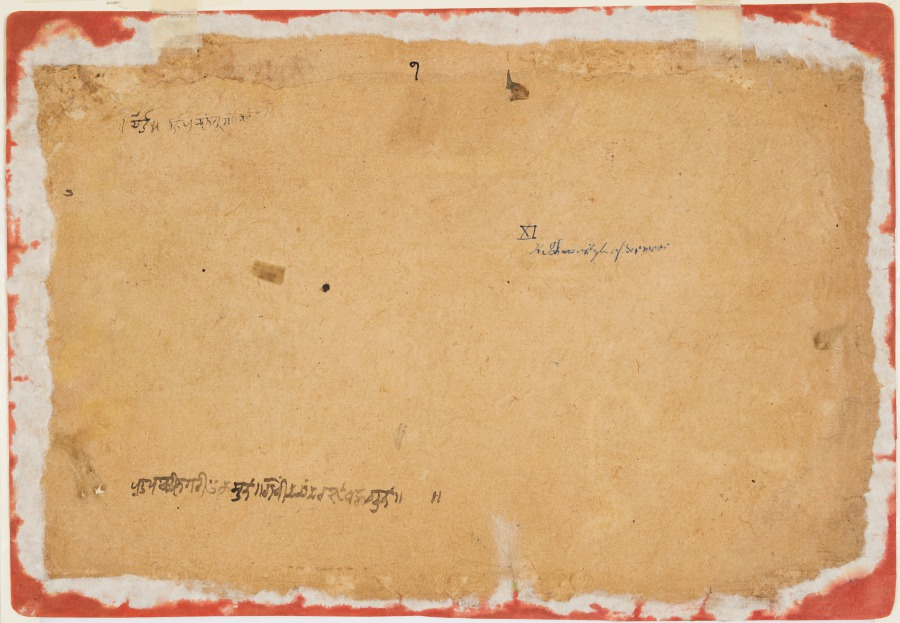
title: Madhava faces a man holding a scale, folio 1 from a Madhavanala-Kamakandala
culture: Northern India, Pahari kingdoms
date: c. 1720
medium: gum tempera, ink, and gold on paper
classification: Painting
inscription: Takri number ‘1’ on verso; one line of Takri script; (in English) Roman numeral: XI; K. Iswari Singh of Sirmur; puhpāvatī nagarī īka sunā. gobiṃdachaṃda rajā bahugunā.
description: In the opening page of the series, the artist sets the scene in the city of Pushpavati. The protagonist Madhava holds a stringed instrument (vina), which he plays so bewitchingly that women become entranced. His good looks and musical talent earn him extra riches, which are being presented to him at the lower left. Other Brahmin priests and members of the nobility become jealous.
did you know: This is the first page in the series, five of which are in the Cleveland Museum of Art collection.